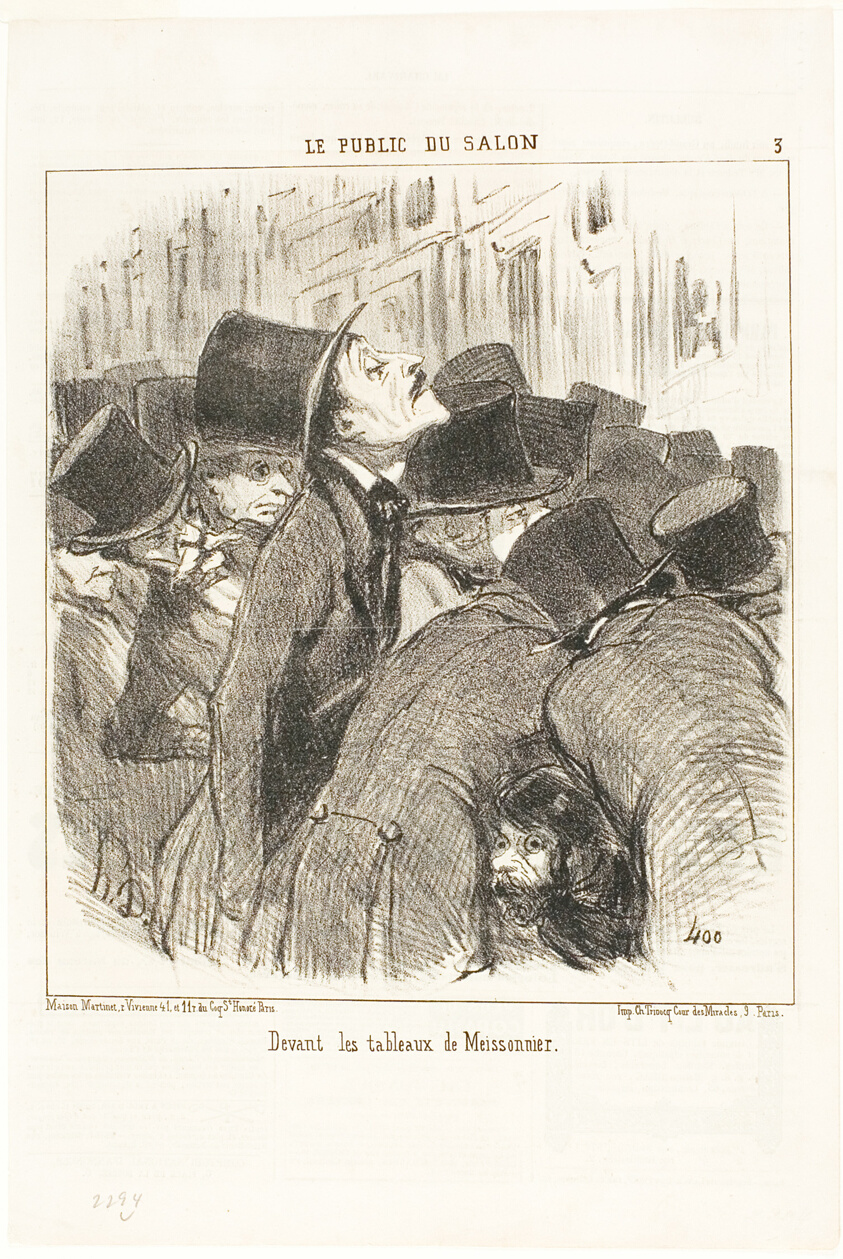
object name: Print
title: In front of Meissonnier's paintings, plate 3 from Le Public Du Salon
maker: Honoré Victorin Daumier; French, 1808-1879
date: 1852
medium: Lithograph in black on white wove paper, with letterpress on recto and verso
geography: France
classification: lithograph; print; prints and drawing